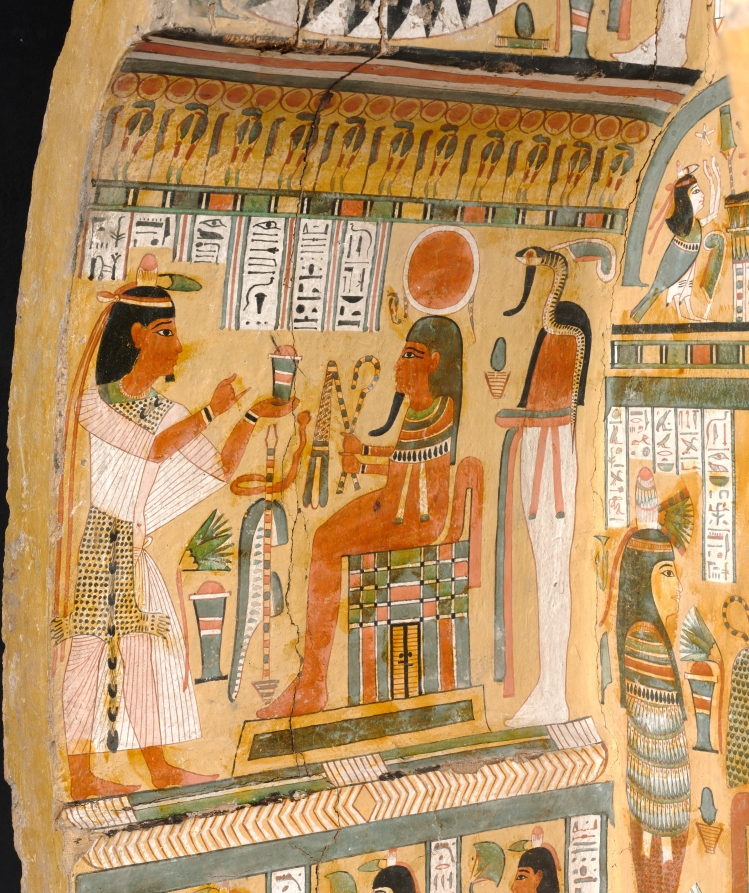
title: Coffin of Nesykhonsu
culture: Egypt, Thebes, Third Intermediate (1069–715 BCE), Dynasties 21–22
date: c. 976–889 BCE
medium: gessoed and painted sycamore fig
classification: Funerary Equipment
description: Egyptian coffins told stories and illustrated spells to help the deceased transition safely to the afterlife. Inside Nesykhonsu's coffin there are two jackals, one facing right and the other left, near the top. Here, the jackal represents the powerful deity Anubis, the god of the afterlife and embalming.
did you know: Two of Nesykhonsu's titles, "Lady of the House" and "Singer of the Choir of Mut the Great," are written on the outside of the coffin.